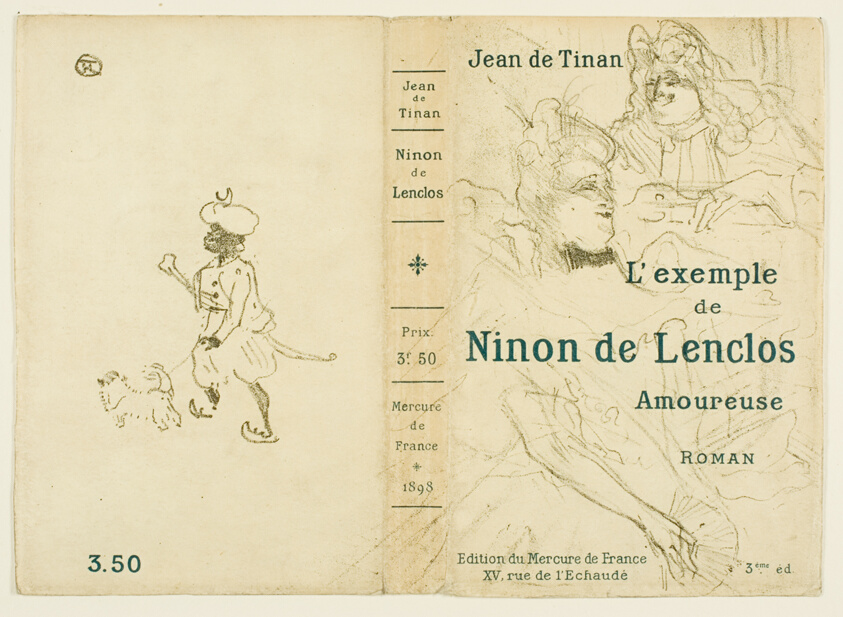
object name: Print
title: Cover for L'exemple de Ninon de Lenclos amoureuse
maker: Henri de Toulouse-Lautrec (French, 1864-1901)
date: 1898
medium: Lithograph with letterpress text added in blue on cream wove paper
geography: France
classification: lithograph; print; prints and drawing